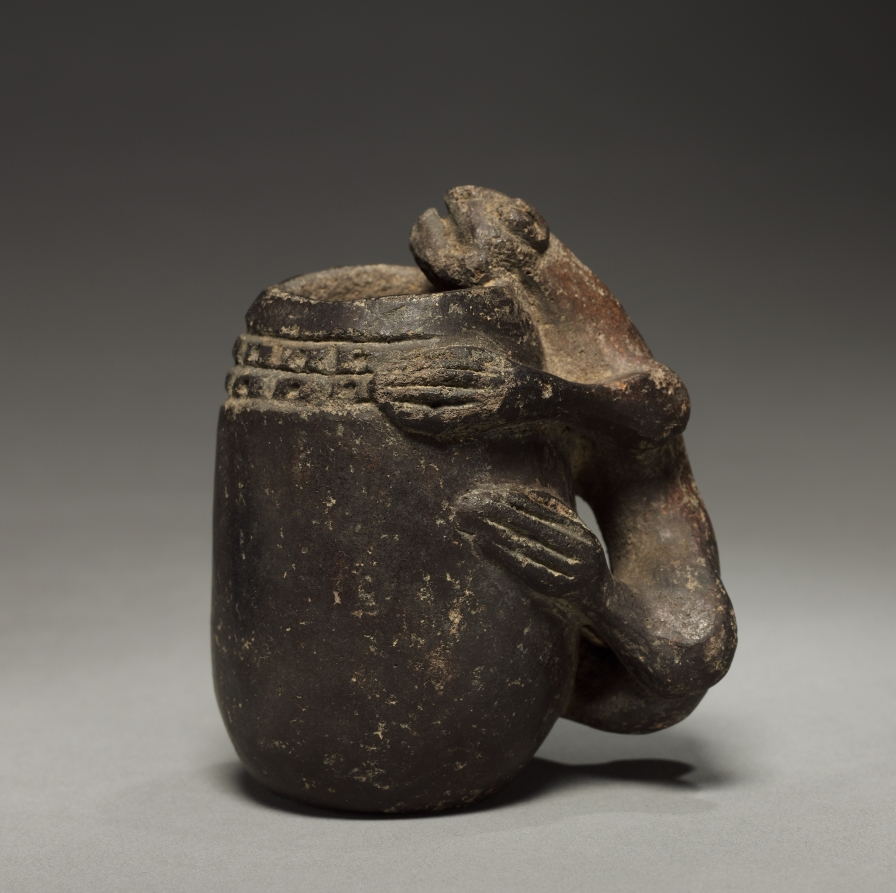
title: Jar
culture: Colombia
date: before 1921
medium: pottery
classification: Ceramic